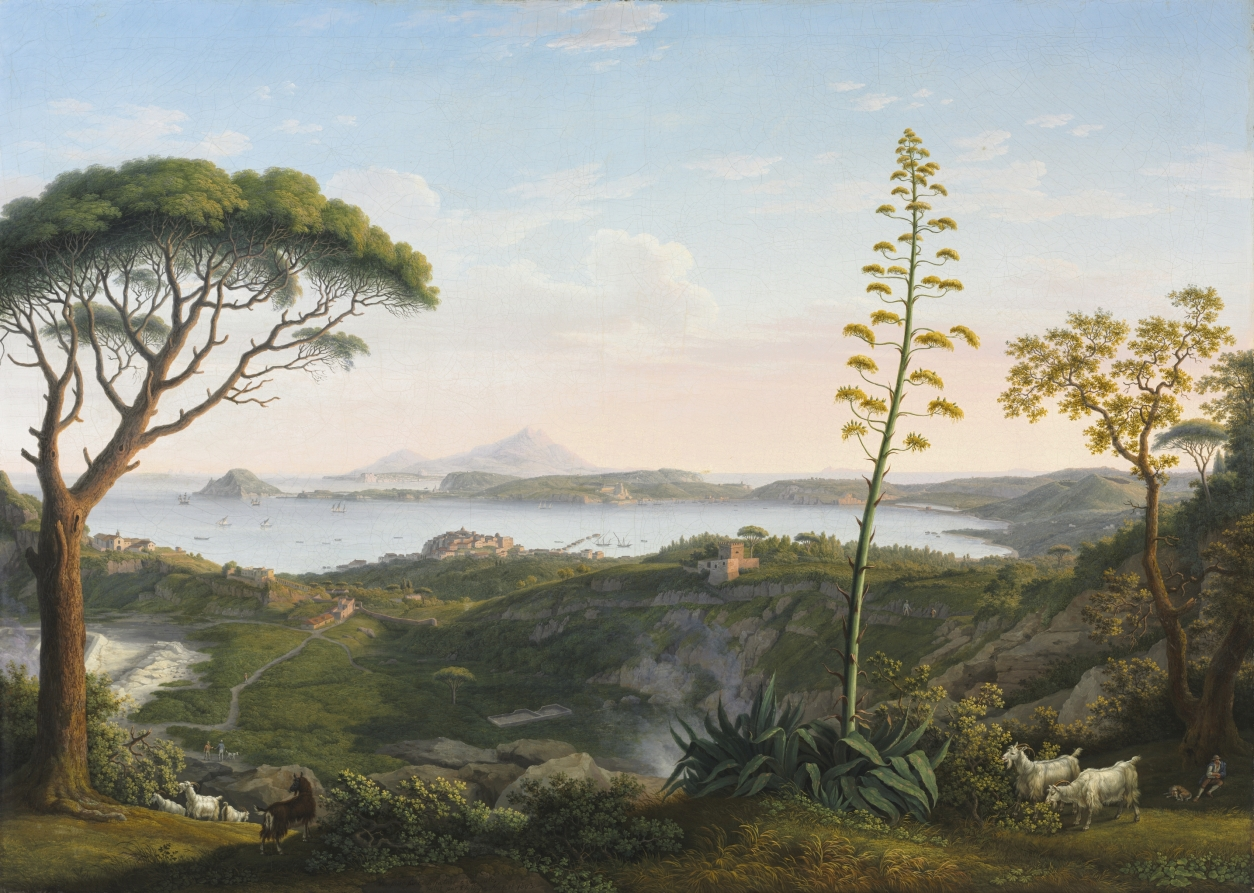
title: View of the Gulf of Pozzuoli from Solfatara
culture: Germany, 19th century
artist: Philipp Hackert (German, 1737–1807)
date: 1803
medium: oil on canvas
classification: Painting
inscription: Inscribed and signed bottom edge to left of center in brown paint: Vue prise sur la Solfatare a Pozzoule, / peint par Philippe Hackert 1803.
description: Attracted to its dramatic vistas, volcanoes, exotic peasants, and classical ruins, landscape painters of the 1700s and 1800s flocked to the countryside around Naples. This view looks west toward the Gulf of Pozzuoli from just above the Solfatara, an area of volcanic steam vents. The ancient town of Pozzuoli, where the apostle Paul landed on his way to Rome, lies in the distance. Hackert's attention to detail and rendering of form with extreme lucidity is characteristic of German Romantic painting.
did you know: While in Naples, the German writer Johann Wolfgang von Goethe took painting lessons from Philipp Hackert; their meetings were documented in Goethe's travelogue Italienische Reise (Italian Journey).